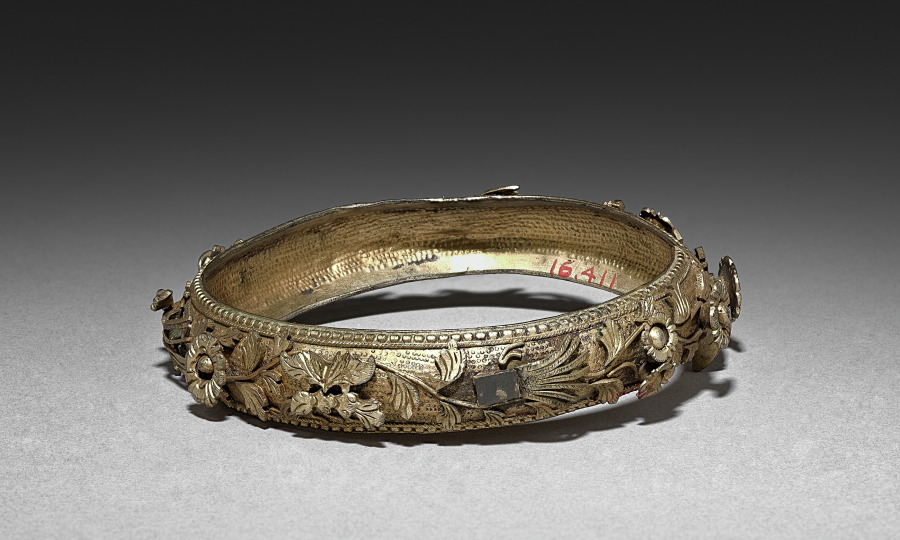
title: Armlet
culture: Burma (?)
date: 1800s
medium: silver gilt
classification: Jewelry